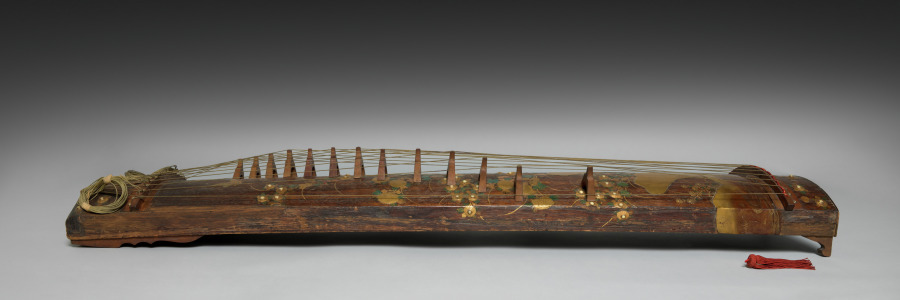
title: Koto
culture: Japan, Edo period (1615–1868)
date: early to mid-1800s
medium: Wood with colored lacquer, sprinkled gold powder (maki-e), glass, textile and cord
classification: Musical Instrument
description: This koto has an elaborately decorated surface, suggesting that it was meant to be admired as a decorative object rather than played as a musical instrument. The vertical design shows a profusion of chrysanthemum and miscanthus grass above a brushwood fence as well as a pair of butterflies.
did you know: The koto descended from the guzheng, a Chinese zither first imported to Japan in the seventh century.